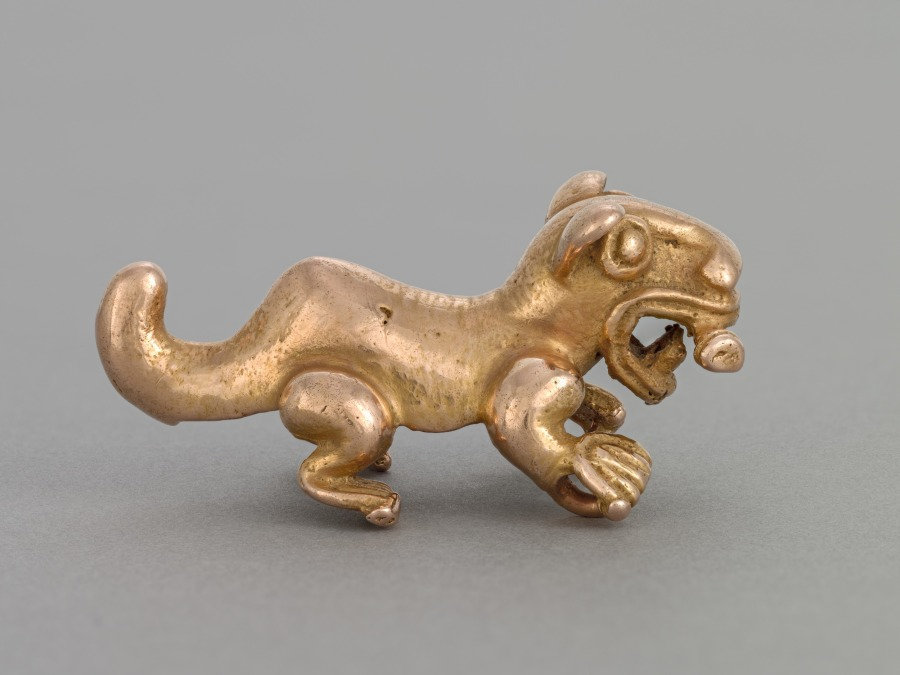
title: Feline Pendant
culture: Isthmian Region, Panama-Costa Rica, Veraguas-Chiriquí style, 11th century-16th century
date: 1000–1550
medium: gold, cast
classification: Metalwork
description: This memorable jaguar pendant is a nasty precious—nasty because it holds a severed limb (probably human) in its fanged mouth but precious due to its material, its well-polished silky surface, and the charming rendering, which reduces the jaguar to cartoon-like essentials. The warm, rosy color is the result of copper in the alloy.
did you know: In the Panama-Costa Rica region gold ornaments were associated with political and religious authority.